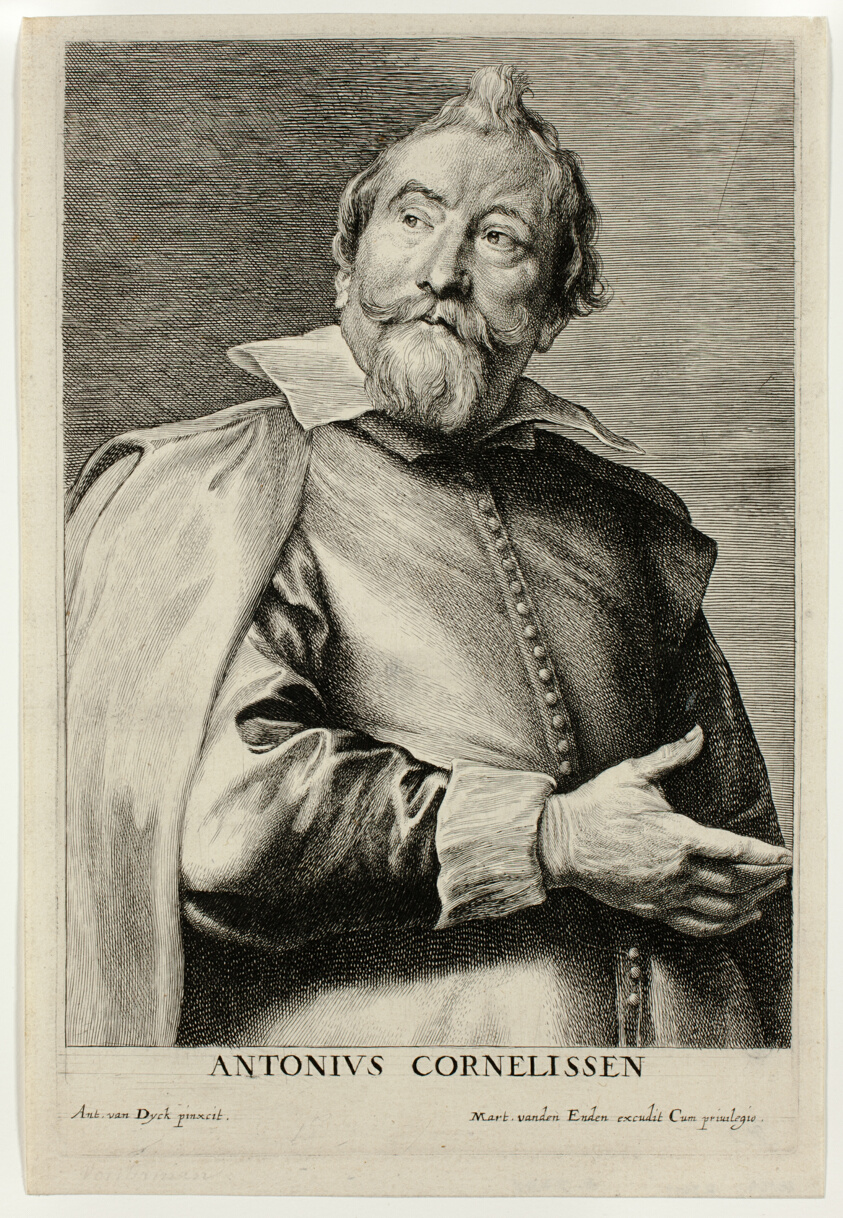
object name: Print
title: Antoon Cornelissen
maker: Lucas Emil Vorsterman (Flemish, 1595-1675); after Anthony van Dyck (Flemish, 1599-1641)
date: 1630/45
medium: Etching and engraving in black on ivory laid paper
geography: Flanders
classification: etching; print; prints and drawing